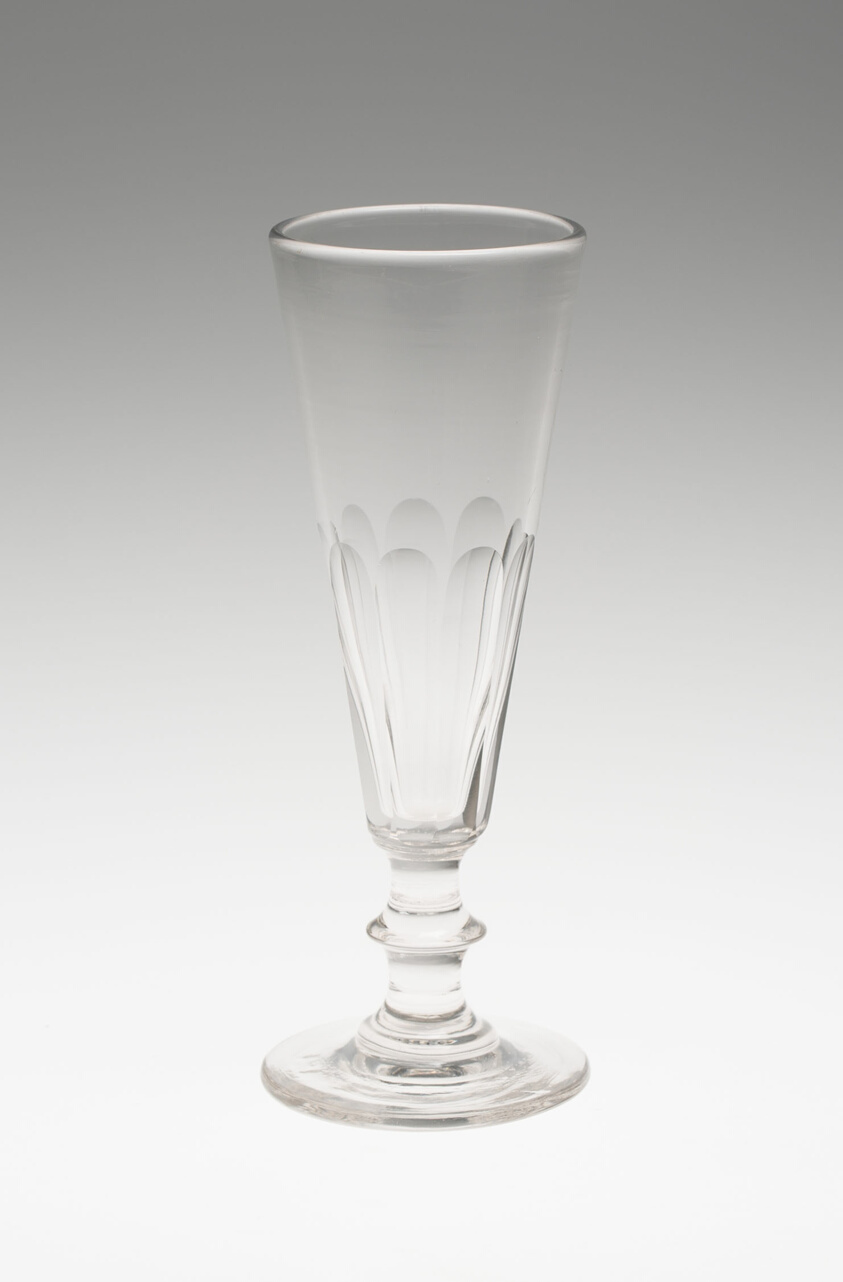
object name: Glass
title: Flute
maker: England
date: 1750/1850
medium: Glass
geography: England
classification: glass